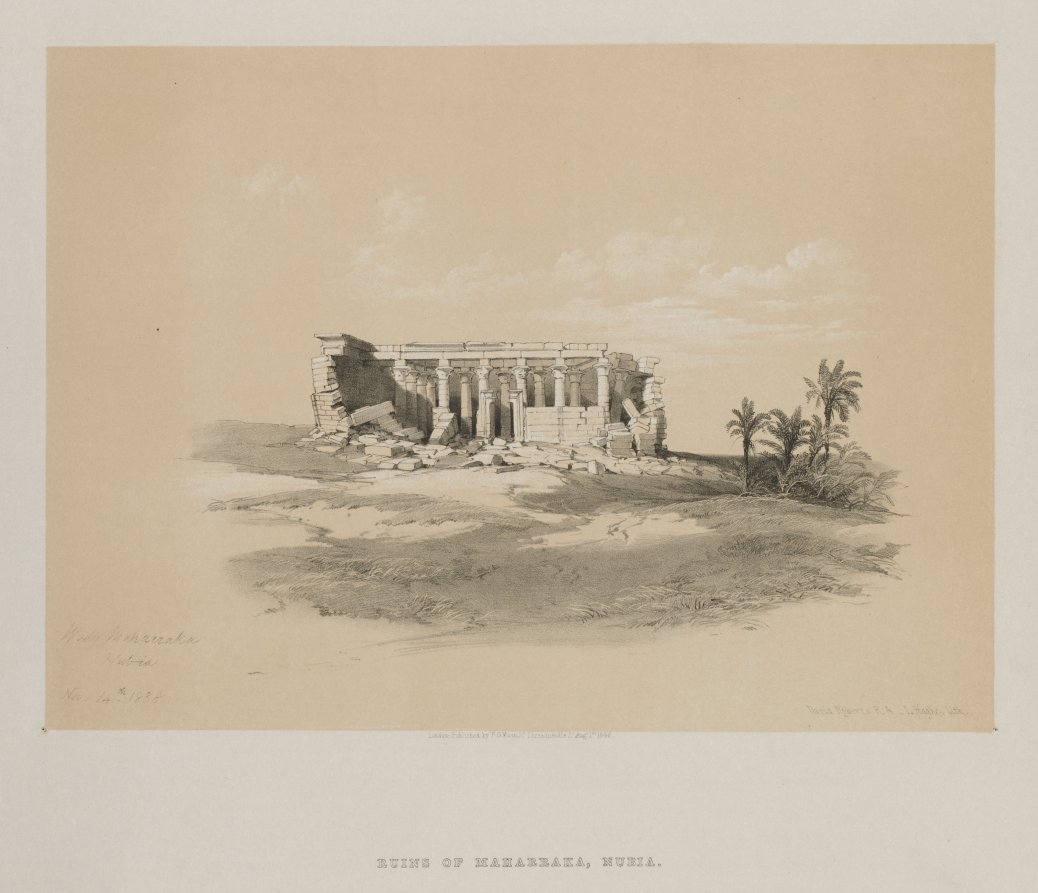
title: Egypt and Nubia, Volume I: Wady Maharraka, Nubia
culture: England, 19th century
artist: Louis Haghe (British, 1806–1885)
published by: F. G. Moon, 20 Threadneedle Street, London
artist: after David Roberts (Scottish, 1796–1864)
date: 1846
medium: color lithograph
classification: Print